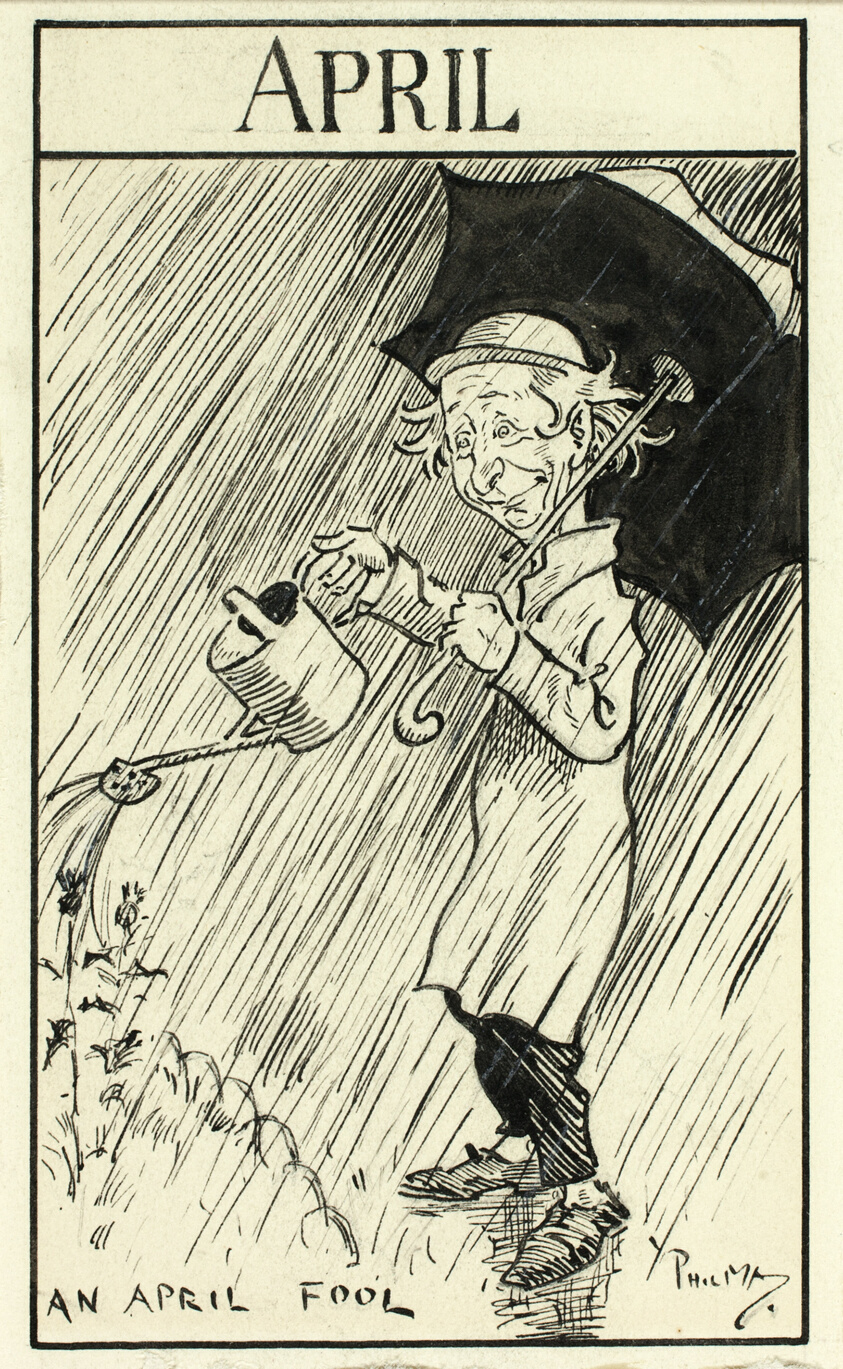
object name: Drawing and Watercolor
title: An April Fool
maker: Philipp William May; English, 1864-1903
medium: Pen and black ink over traces of graphite, on ivory wove paper, laid down on board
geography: England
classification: pen and ink drawings; drawings (visual works); prints and drawing